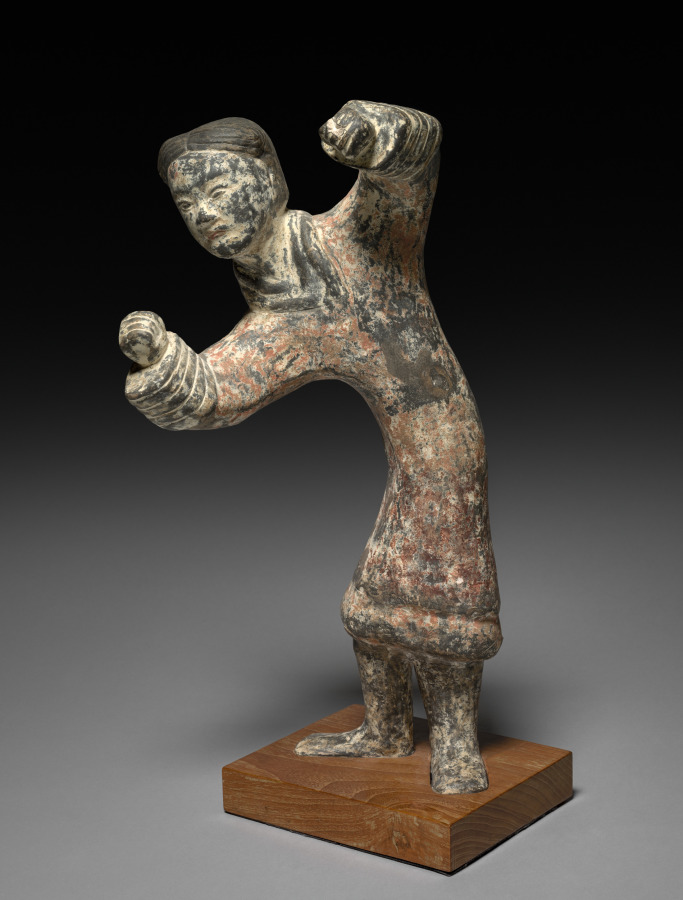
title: Dancing Figure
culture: China, style of Han dynasty (202 BCE–220 CE)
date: c. 1850–c. 1950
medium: painted plaster of Paris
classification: Sculpture